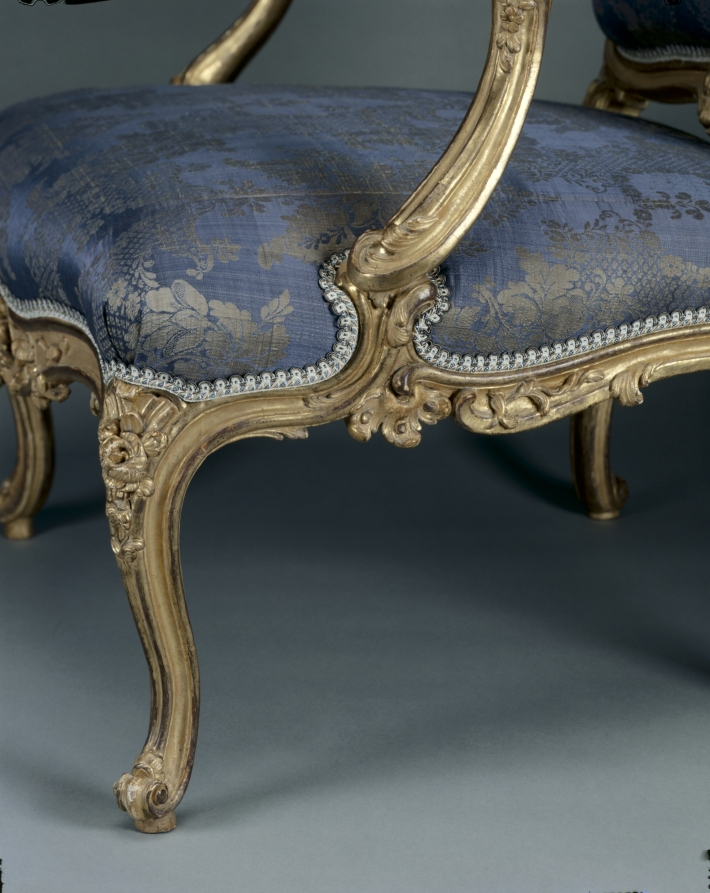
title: Armchair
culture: France, 18th century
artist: attributed to Nicolas Heurtaut (French, 1720–1771)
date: c. 1755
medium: carved and gilded wood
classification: Furniture and woodwork